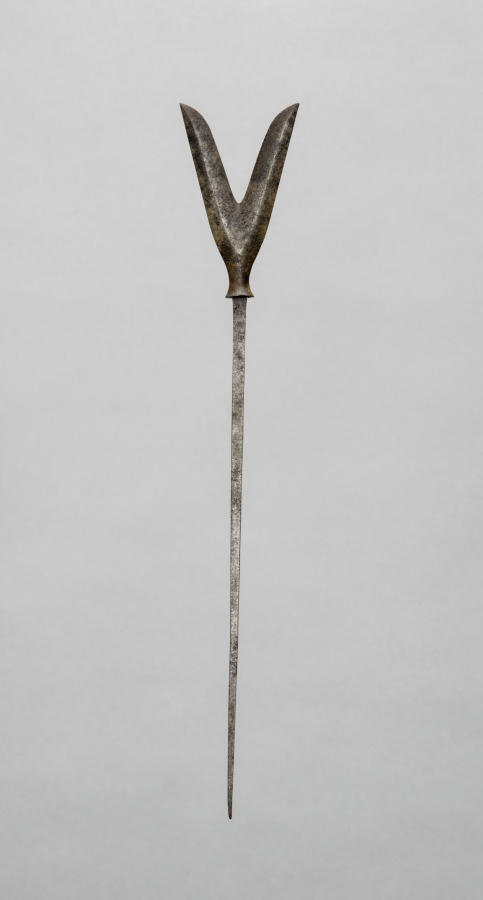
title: Arrow Point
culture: Japan, Edo period (1615–1868)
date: 1700s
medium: steel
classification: Arms and Armor